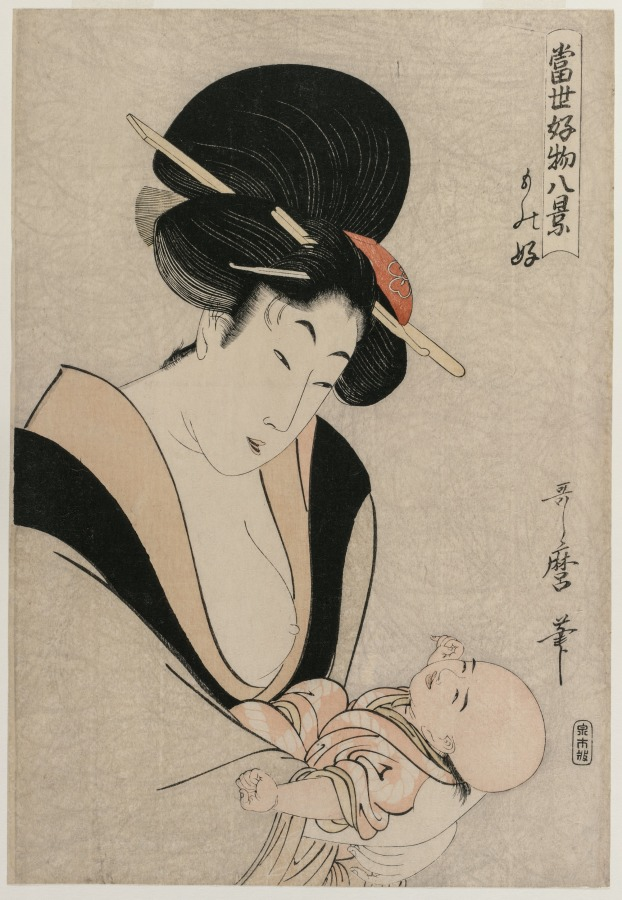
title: Fond of Things from the series Eight Views of Favorite Things of Today's World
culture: Japan, Edo period (1615–1868)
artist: Kitagawa Utamaro (Japanese, c. 1754–1806)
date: late 1790s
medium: color woodblock print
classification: Print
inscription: Artist's signature: Utamaro hitsu.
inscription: Publisher: Izumiya Ichibei (Senichi han).